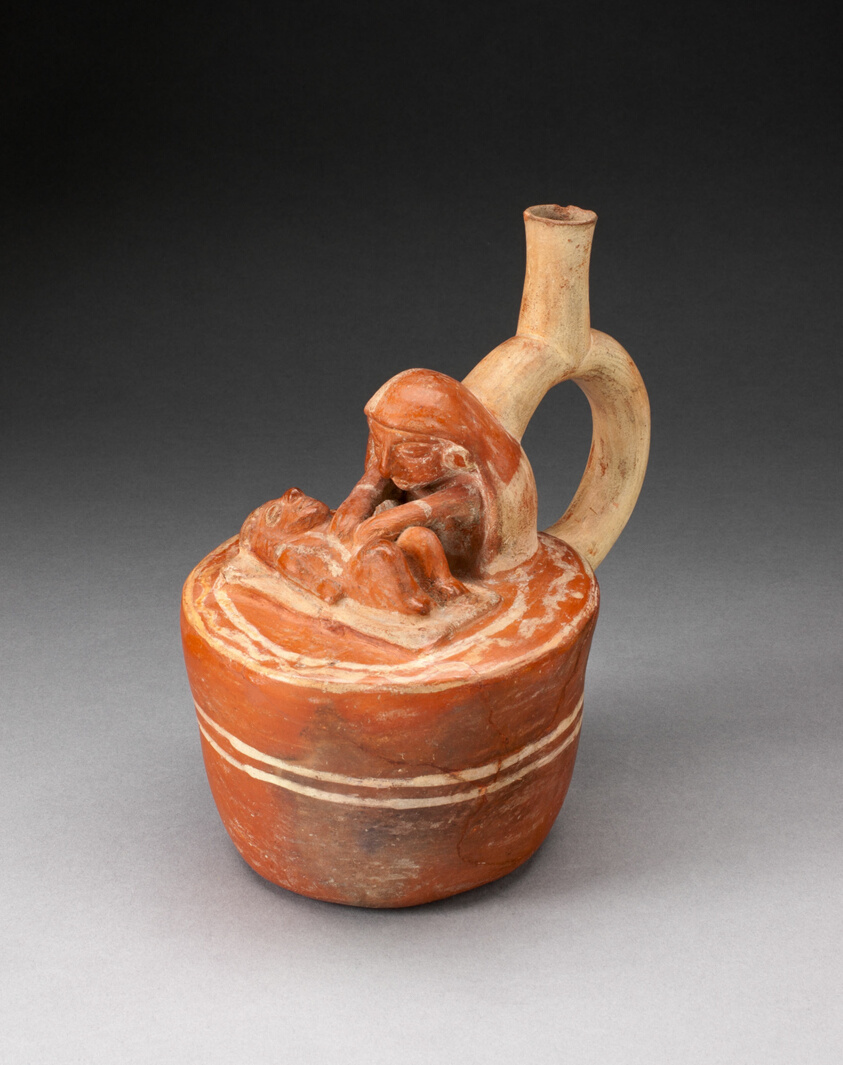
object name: Vessel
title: Handle Spout Vessel with Healer or Midwife Touching a Reclining Figure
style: moche, mochica, early intermediate period, Pre-Columbian, americas, Arts of the Americas, andean, andes, south american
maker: Moche (North coast, Peru)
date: 100 BCE–500 CE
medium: Ceramic and pigment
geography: Peruvian North Coast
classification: earthenware; art of the americas; ceramics; vessel